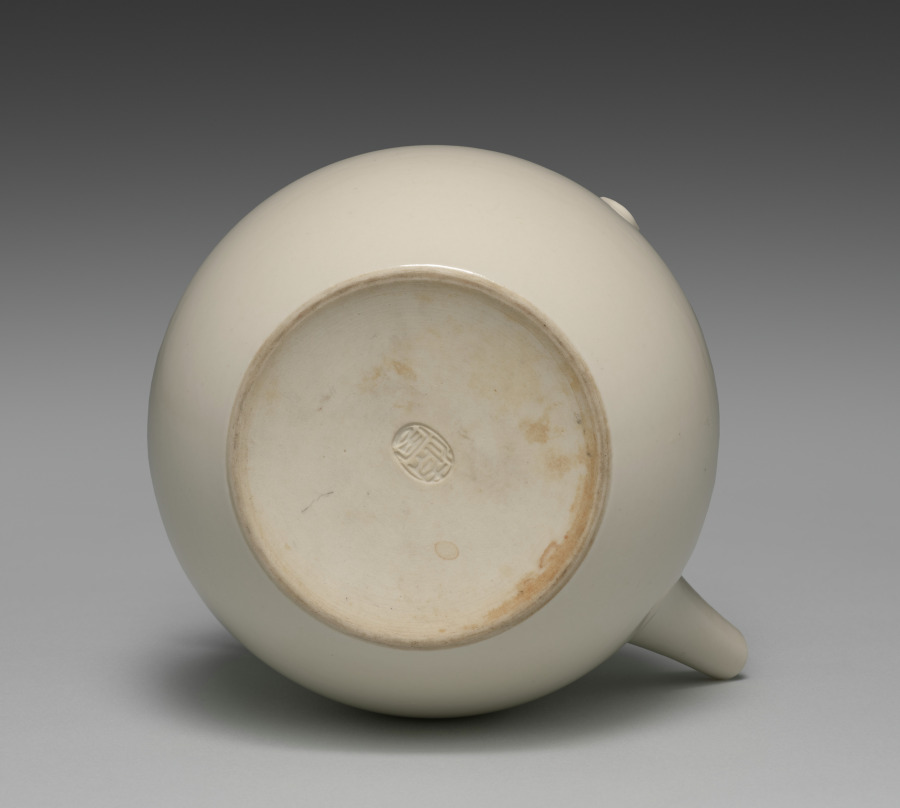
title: Teapot with Ruyi Motifs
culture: Japan, Meiji period (1868–1912)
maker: Seifū Yohei III (Japanese, 1851–1914)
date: 1893–1914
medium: Porcelain with molded design and iron handles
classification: Ceramic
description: The simple, round form of this teapot is embellished with only a pair of nyoi staff-head motifs, one on each side. Two arched iron handles, parallel to each other, are hooked through holes in raised tabs at the front and back of the shoulders of the pot. The round lid is depressed so that an iron ring handle fastened with an iron clamp passing through the lid can lie flat inside the recessed area. The box is not original to the piece and has an inscription dated to 1960. The person who wrote it clearly admired Yohei III and his efforts to produce works that resembled Chinese ceramics. The inscription describes Yohei’s journey to perfecting these copies but misidentified the Chinese kiln whose wares were the basis for this particular work.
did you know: The base of the pot has a “Seifu” seal.